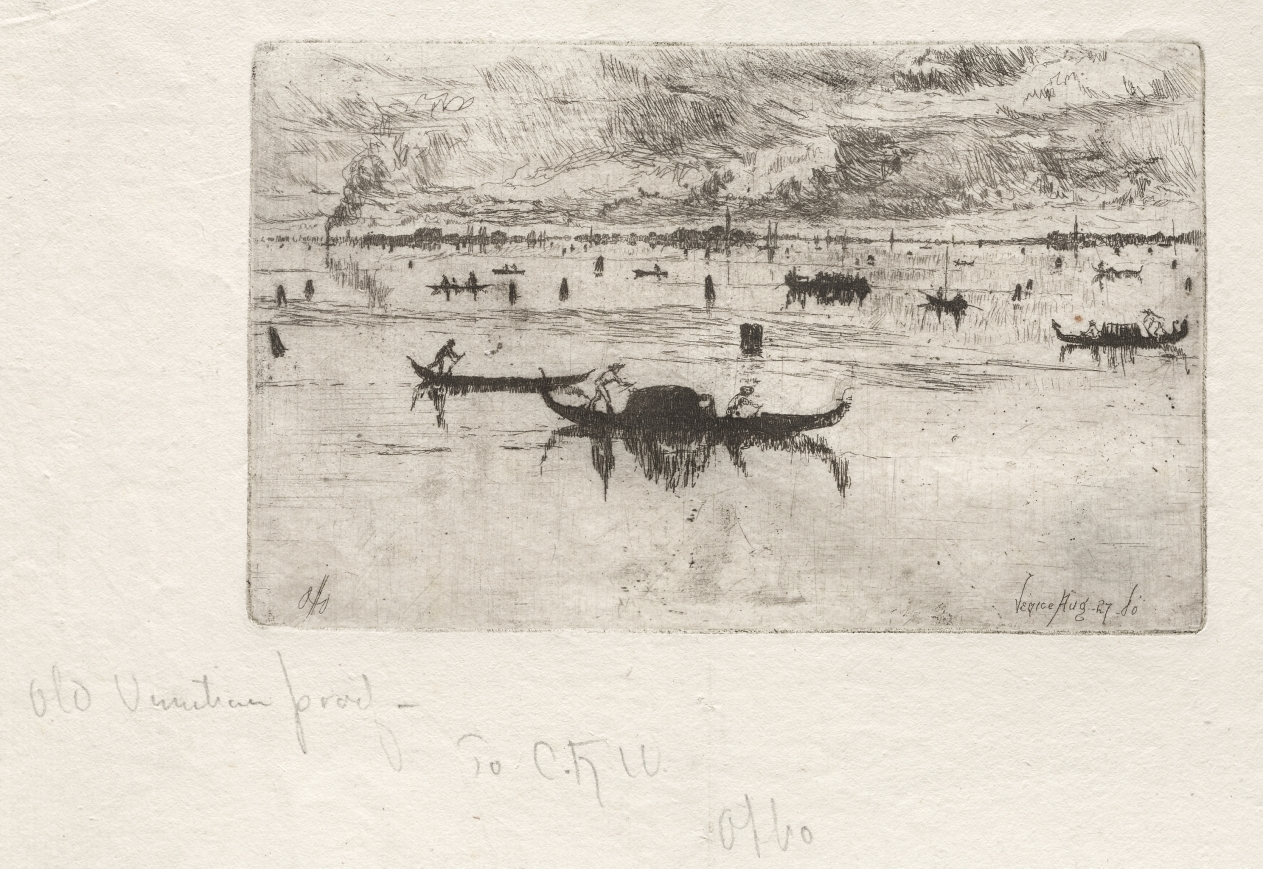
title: Looking toward the Salute, Venice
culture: America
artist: Otto H. Bacher (American, 1856–1909)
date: 1880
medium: etching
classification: Print